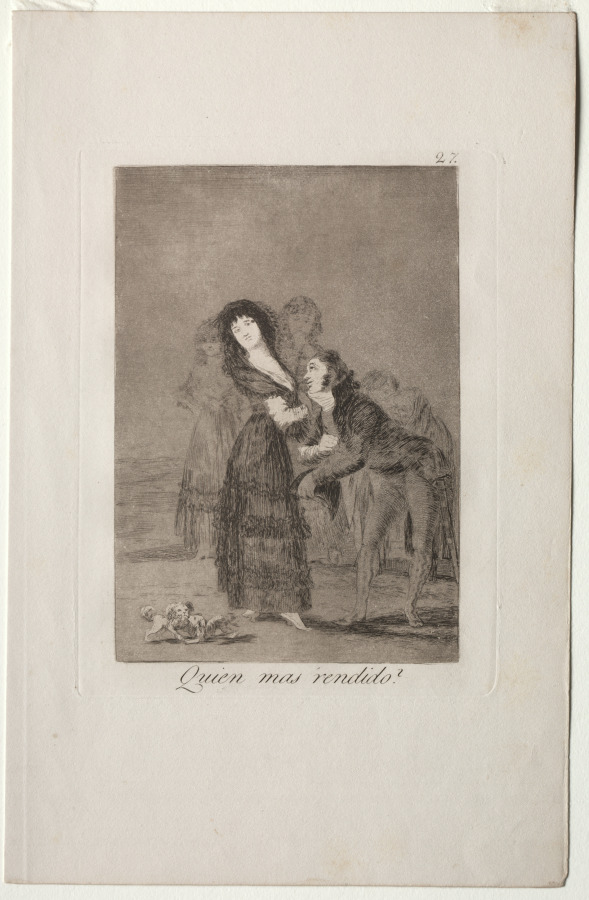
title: Which of Them is the More Overcome?, Plate 27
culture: Spain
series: Los Caprichos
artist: Francisco de Goya (Spanish, 1746–1828)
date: 1799 (printed c. 1855)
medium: etching and aquatint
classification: Print